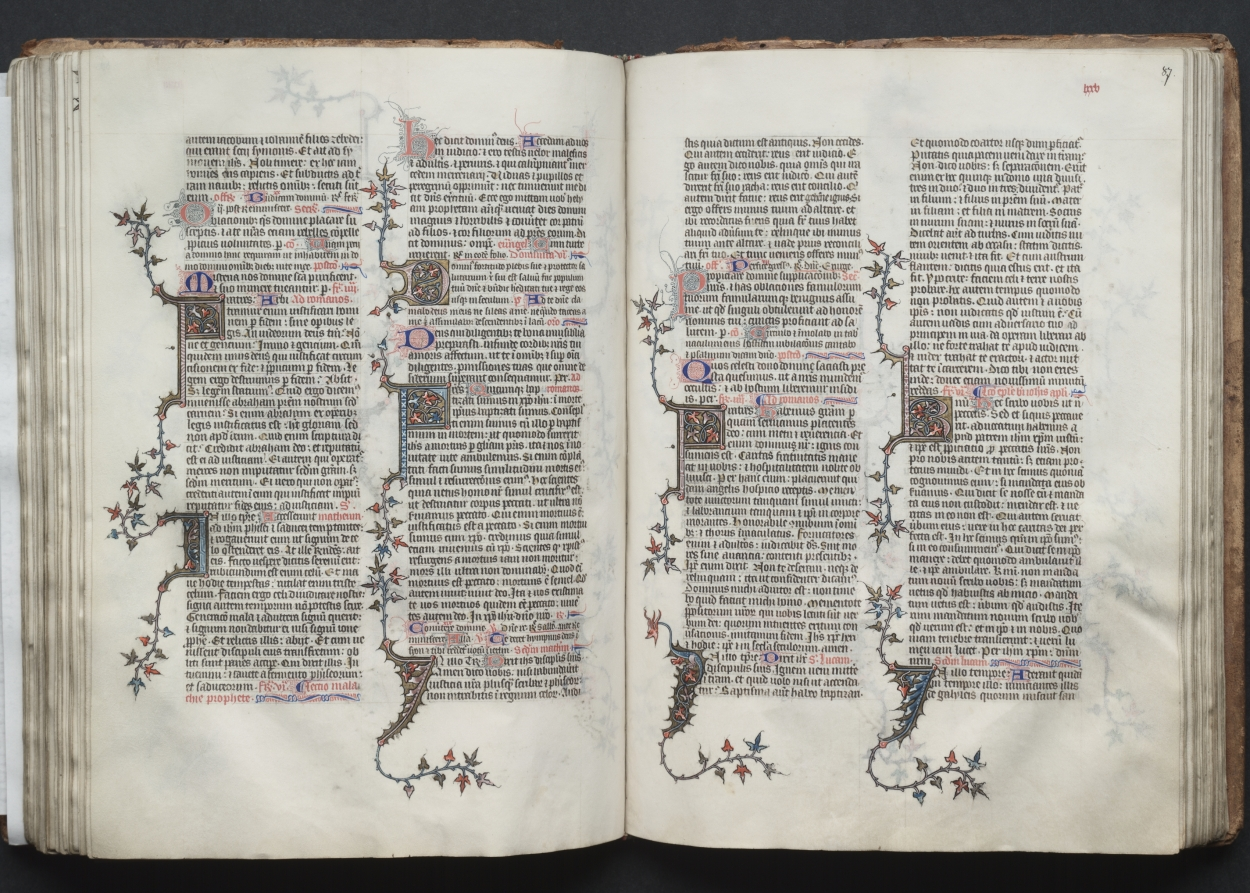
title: The Gotha Missal: Fol. 86v, Text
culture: France, Paris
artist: Master of the Boqueteaux (French)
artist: and Workshop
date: c. 1375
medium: ink, tempera, and gold on vellum; blind-tooled leather binding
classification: Bound Volume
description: The style and quality of this manuscript's decoration is typical of deluxe Parisian books made for aristocratic or royal patrons. Most of the book's decoration appears to be the work of the Master of the Boqueteaux, an artist active at the court of King Charles V (died 1380). His style was apparently shared by a number of book illuminators working in and around Paris. It is very possible that the Gotha Missal belonged to Charles V, but is not provable because the manuscript has no royal portraits and lacks a colophon. Given the book's magnificent decoration, however, it would seem that it was produced for a Valois prince, if not for the king himself. The manuscript receives its name from the German dukes of Gotha, its later owners.